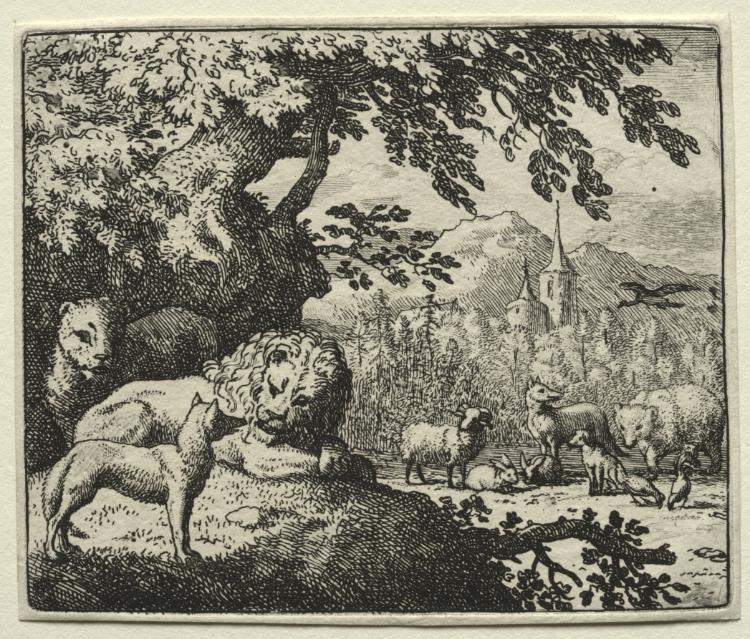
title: Reynard the Fox: Reynard Continues His Story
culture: Netherlands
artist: Allart van Everdingen (Dutch, 1621–1675)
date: 1650–75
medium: etching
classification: Print